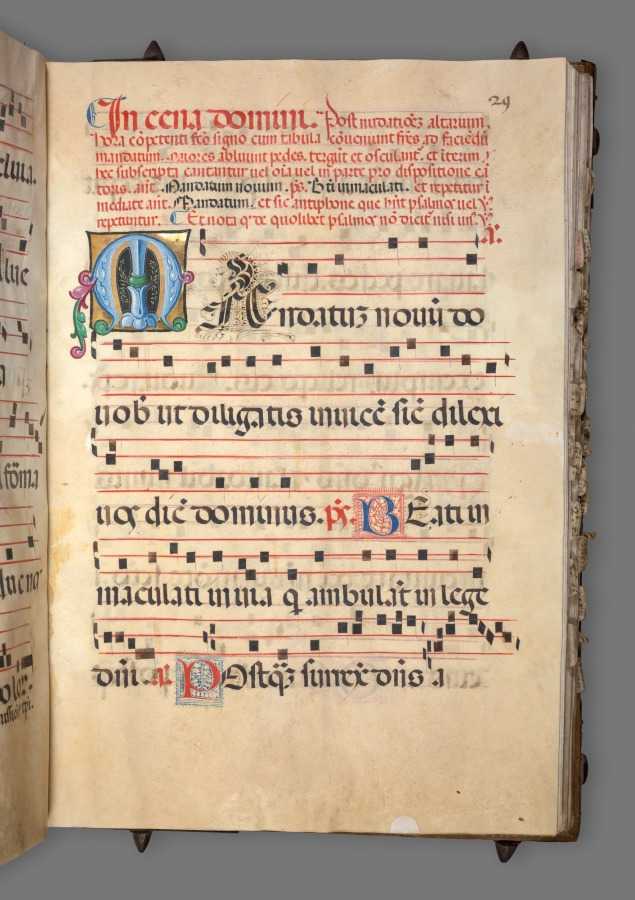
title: Gradual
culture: Italy, Verona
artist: circle of Girolamo dai Libri (Italian, 1474–1555)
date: c. 1520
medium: Ink, tempera, and gold on vellum; wood binding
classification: Manuscript